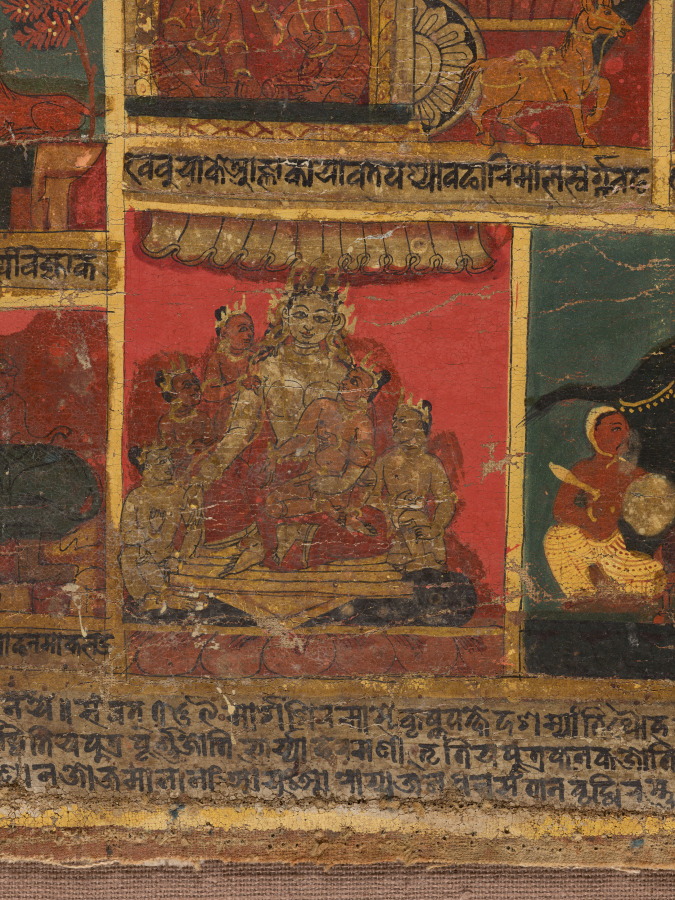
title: Bejeweled Buddha Preaching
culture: Nepal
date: 1648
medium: Gum tempera, ink, and gold on cloth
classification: Painting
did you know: Nepalese devotional paintings on cloth are called "paubha" in the Newari language.